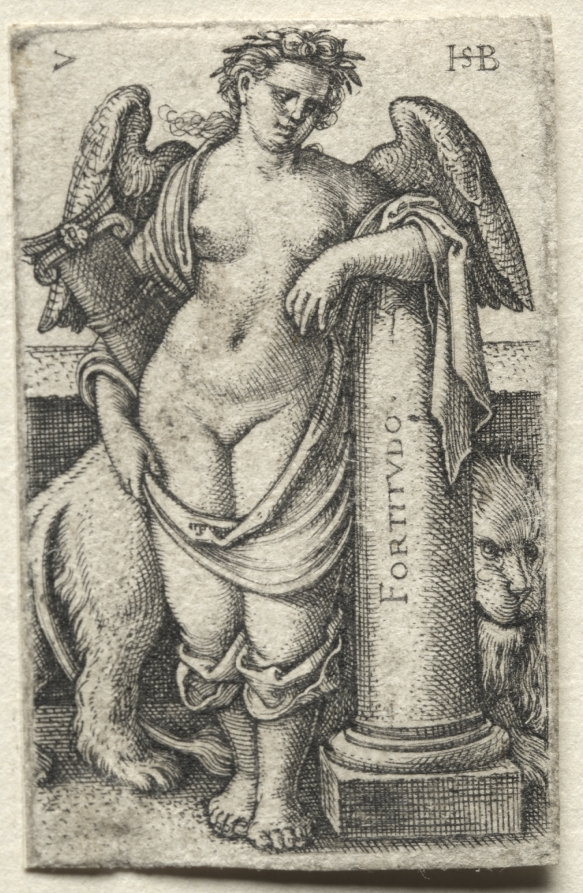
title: The Knowledge of God and the Seven Cardinal Virtues: Fortitude - Fortitudo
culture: Germany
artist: Hans Sebald Beham (German, 1500–1550)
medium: engraving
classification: Print